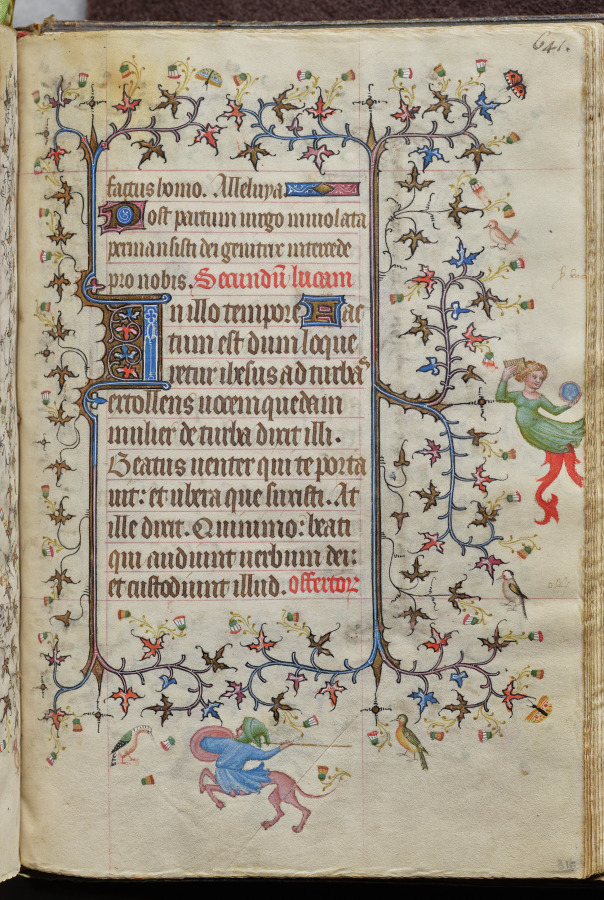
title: Hours of Charles the Noble, King of Navarre (1361-1425), fol. 315r, Text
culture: France, Paris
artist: Master of the Brussels Initials and Associates (French)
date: c. 1405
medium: ink, tempera, and gold on vellum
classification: Bound Volume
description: This precious volume was obviously highly prized by its owner, the French-born King of Navarre, who had his coat of arms painted on no less than twenty folios. Rather than directly commissioning this manuscript from a specific workshop, it seems that Charles the Noble acquired his book of hours -- perhaps ready-made for the luxury market -- while on a trip to Paris in 1404-05. A collaborative effort, six painting styles are evidenced within the pages of this codex, those of two Italians, two Frenchmen, and two Netherlanders. The painter who was responsible for the planning and decoration of the book, and who produced seventeen of the large miniatures, was a Bolognese artist known as the Master of the Brussels Initials. His principal assistant, responsible for most of the borders, was a Florentine who signed his name "Zecho" da Firenze on folio 208 verso.